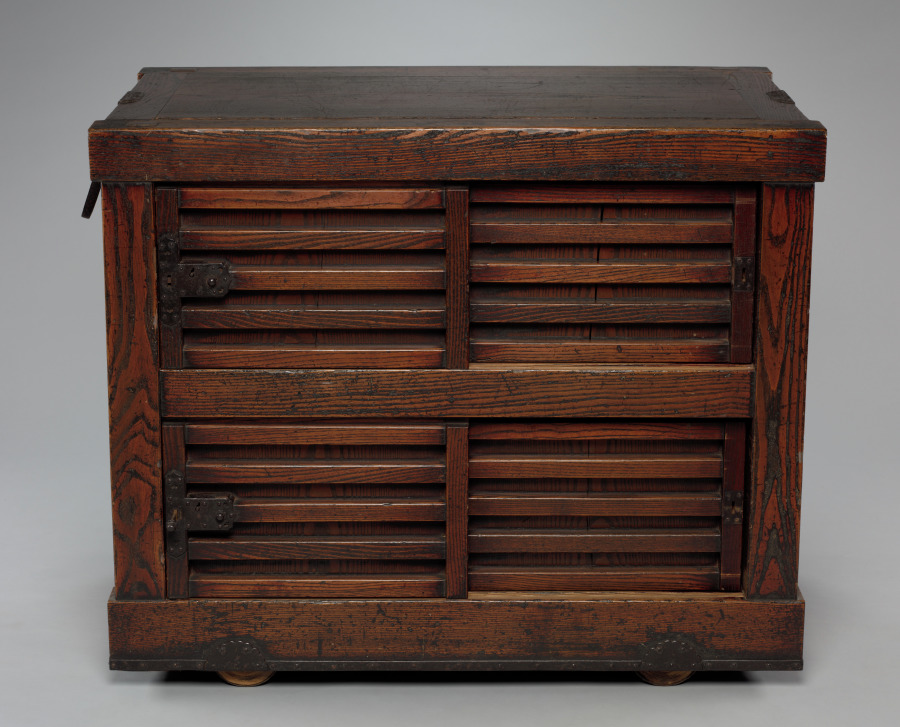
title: Chest on Wheels (Kurumadansu)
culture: Japan, Edo period (1615–1868)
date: 1715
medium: wood with iron fittings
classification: Furniture and woodwork